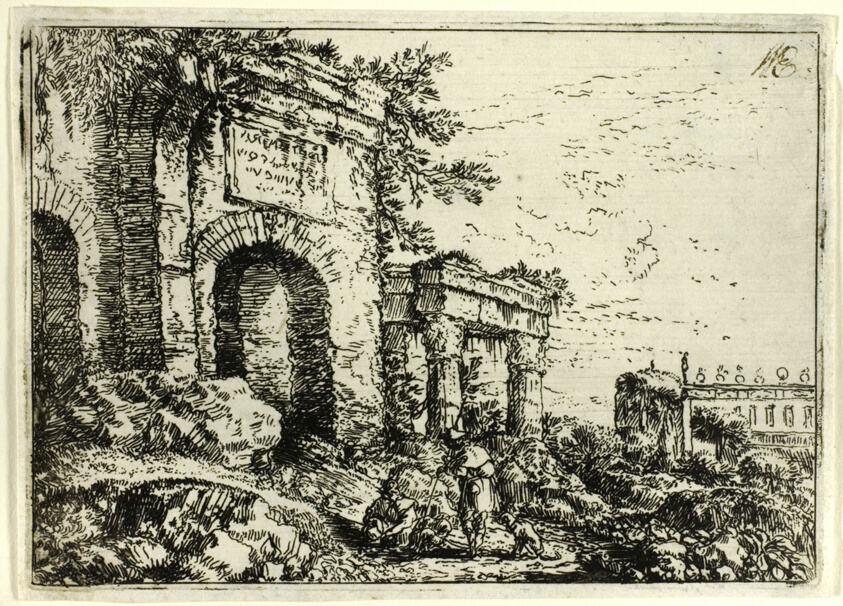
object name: Print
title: Italian Landscape with Ruins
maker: Jonas Umbach the Elder; German, 1624-1693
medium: Etching in black on ivory laid paper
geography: Germany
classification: etching; print; prints and drawing